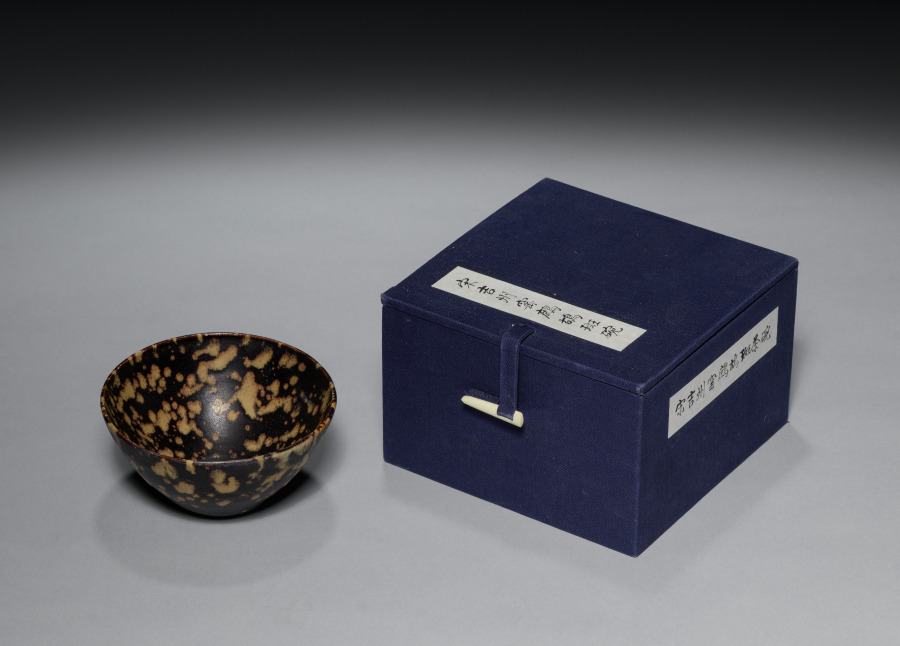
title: Teabowl with Tortoiseshell Glaze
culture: China, Jiangxi Province, Southern Song dynasty (1127–1279)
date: 1100s–1200s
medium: Brown-glazed stoneware with "tortoiseshell" pattern, Jizhou ware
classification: Ceramic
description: This teacup with a so-called tortoiseshell glaze is a fine example of southern ware from Jizhou, where potters specialized in brown splashed glazes sometimes resembling partridge feathers or tortoise shells. The variety of dark glazes and vessel types produced by the Jizhou kilns are evidence of the popularity of black ware at the time. Jizhou kiln potters competed with the Jian kilns which produced almost exclusively teacups, such as the Black-Glazed Teabowl (CMA 2020.176) and the Black-Glazed Teabowl with Incised Characters (CMA 2020.175).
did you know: The Jizhou kiln site is designated as one of fifty-one Major National Historical and Cultural Sites in Jiangxi province.